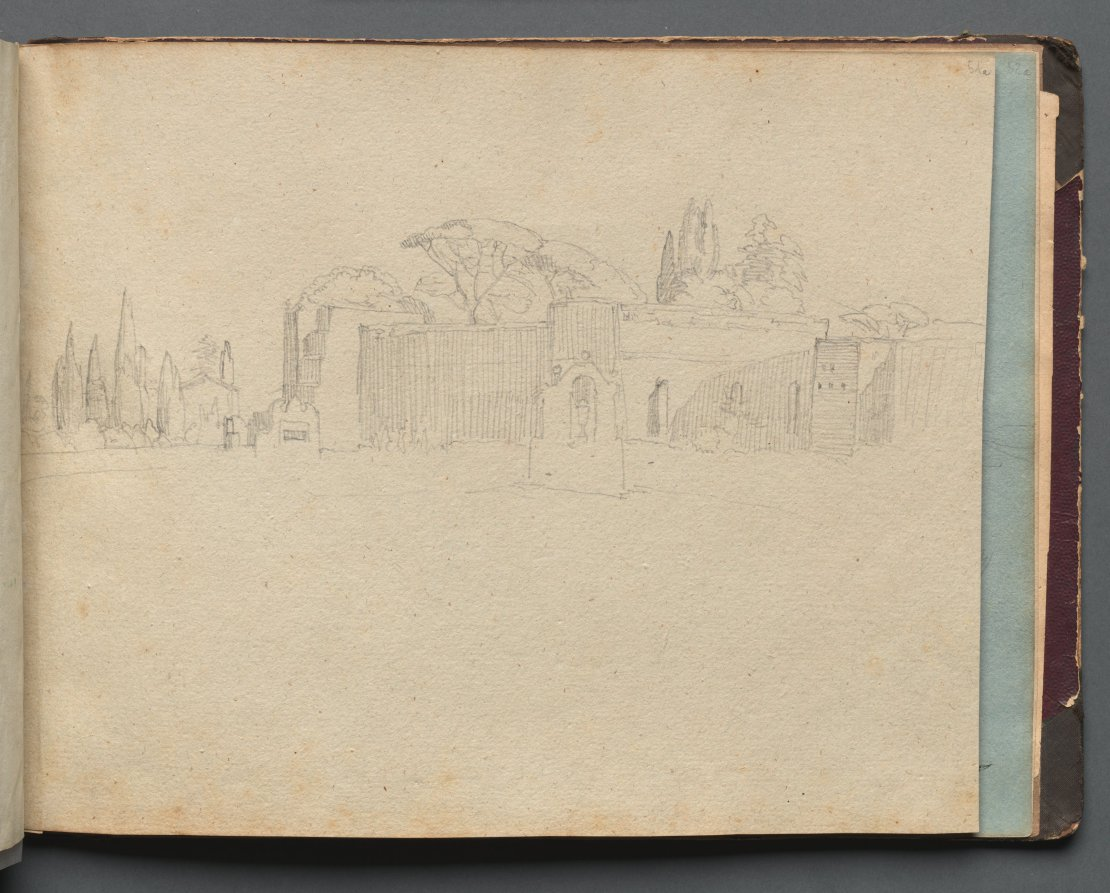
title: Album with Views of Rome and Surroundings, Landscape Studies, page 51a: Roman Landscape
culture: Germany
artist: Franz Johann Heinrich Nadorp (German, 1794–1876)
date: c. 1830s-70s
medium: graphite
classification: Bound Volume